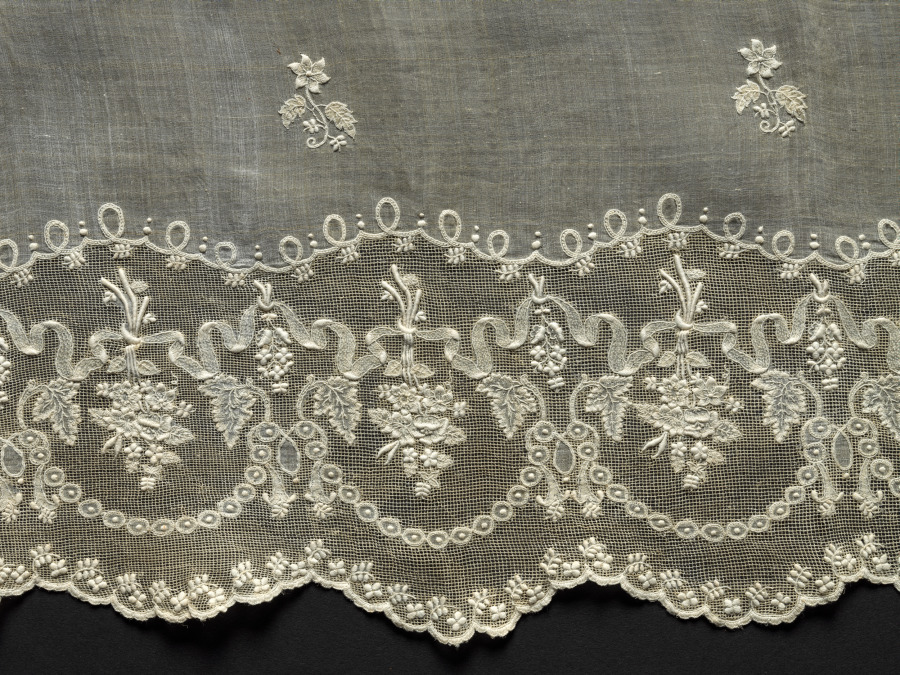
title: Blouse in four pieces (sleeve)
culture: Philippines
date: 1800s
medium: Plain weave piña; needle lace (drawnwork) and white cotton embroidery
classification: Embroidery